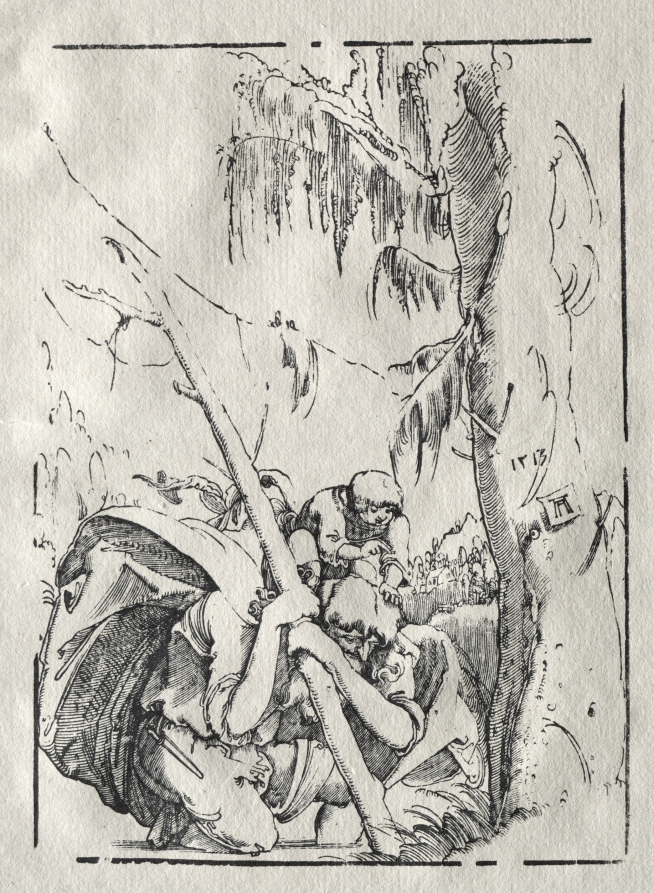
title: St. Christopher Crossing the Water with Christ on his Shoulders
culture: Germany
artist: Albrecht Altdorfer (German, c. 1480–1538)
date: 1513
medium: woodcut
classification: Print